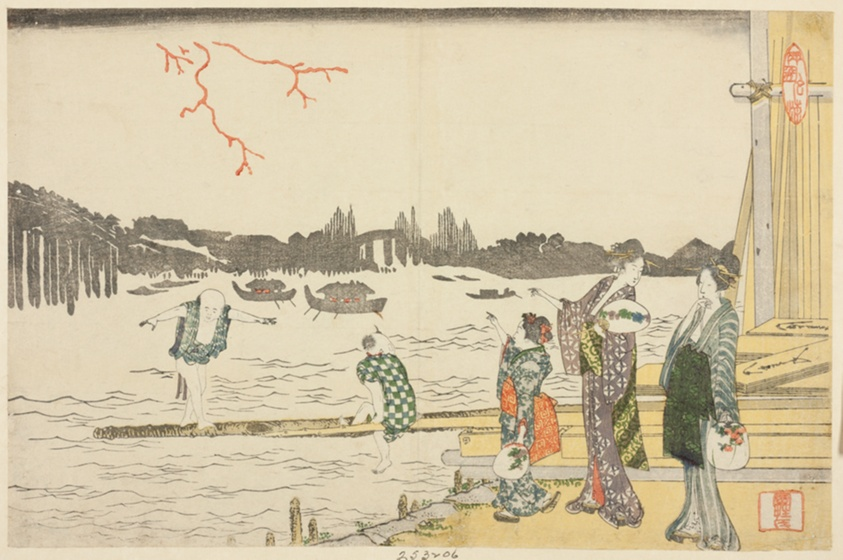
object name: Print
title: Women and Children Viewing the Fireworks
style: Japanese (culture or style)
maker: Katsushika Hokusai 葛飾 北斎; Japanese, 1760-1849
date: c. 1798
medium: Color woodblock print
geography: Japan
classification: woodblock print; print; asian art